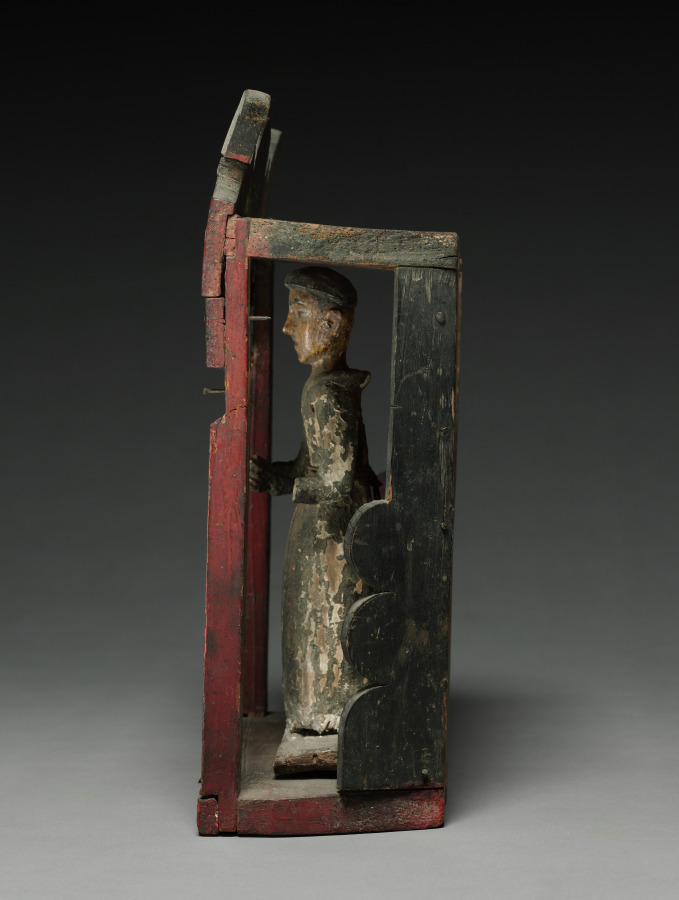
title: Figure with Nicho: santo de bulto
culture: America, New Mexico, 17th-18th century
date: 17th-18th Century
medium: painted wood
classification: Sculpture